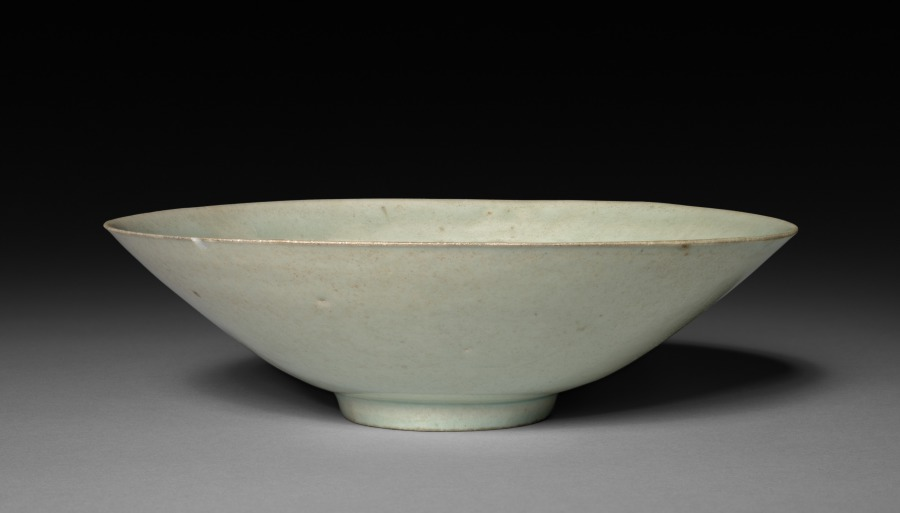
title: Bowl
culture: China, Southern Song dynasty (1127-1279)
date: 1100s–1200s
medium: Glazed porcelain, qingbai ("blue-white") ware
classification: Ceramic